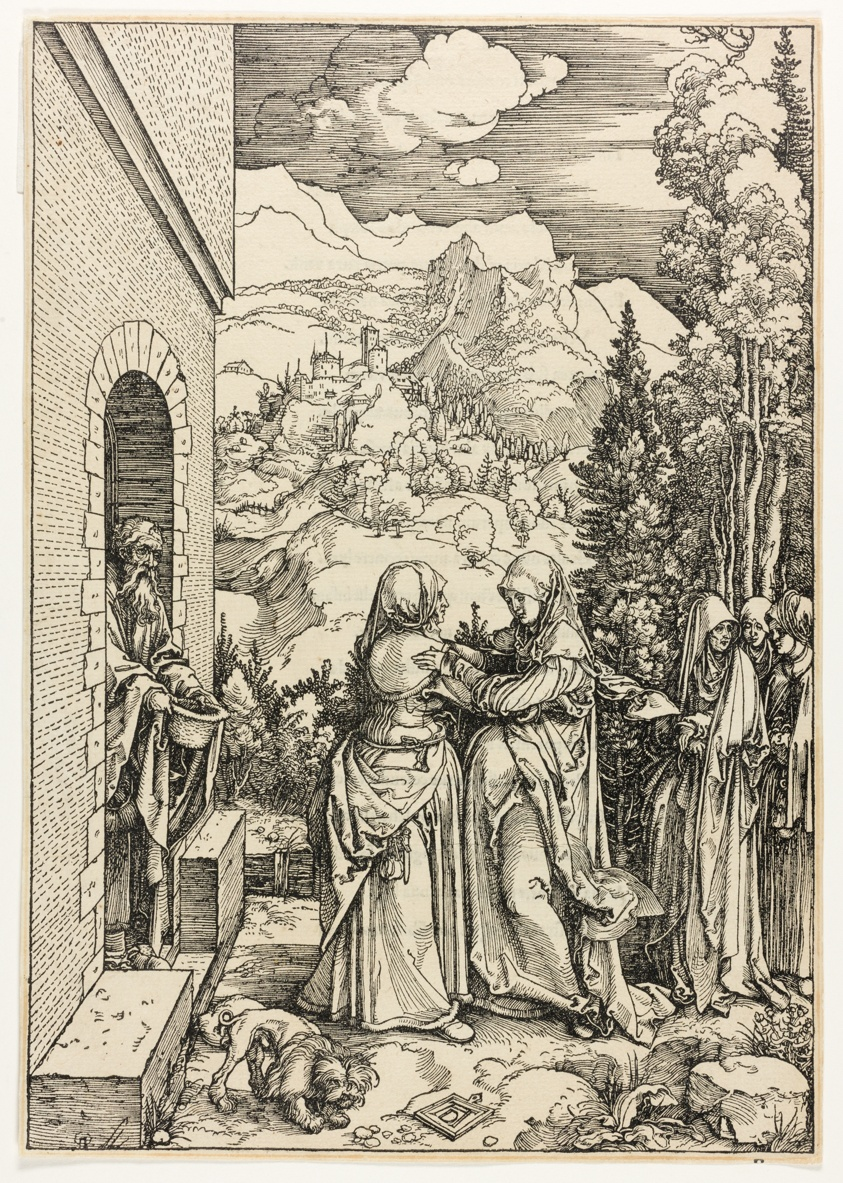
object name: Print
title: The Visitation, from The Life of the Virgin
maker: Albrecht Dürer (German, 1471-1528)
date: c. 1504, published 1511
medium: Woodcut in black on tan laid paper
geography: Germany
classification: woodcut; print; prints and drawing; paper